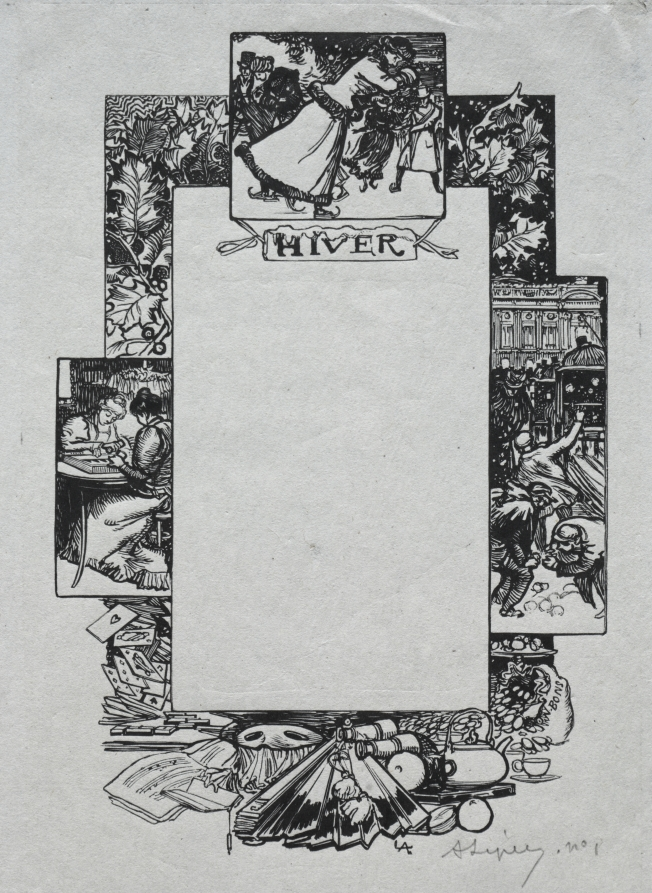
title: Paris Almanac, 1897: Decorative Border, Winter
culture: France, late 19th Century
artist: Auguste Louis Lepère (French, 1849–1918)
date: 1897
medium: wood engraving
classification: Print